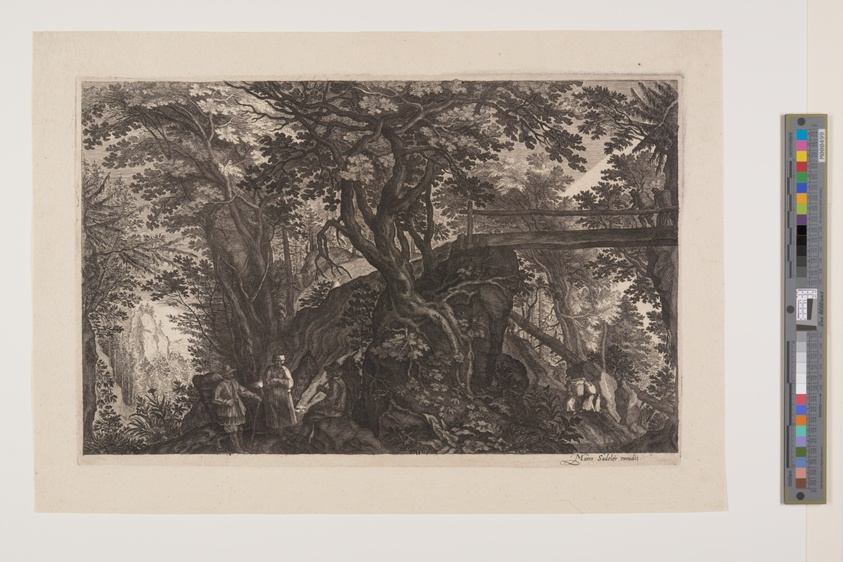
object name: Print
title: A Forest with a Wooden Bridge on the Right, from Eight Scenes from Bohemia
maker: Aegidius Sadeler II (Flemish, c. 1570–1629); after Pieter Stevens (Flemish, 1567-after 1624)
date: c. 1610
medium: Engraving on ivory laid paper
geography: Flanders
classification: print; paper; prints and drawing; engraving